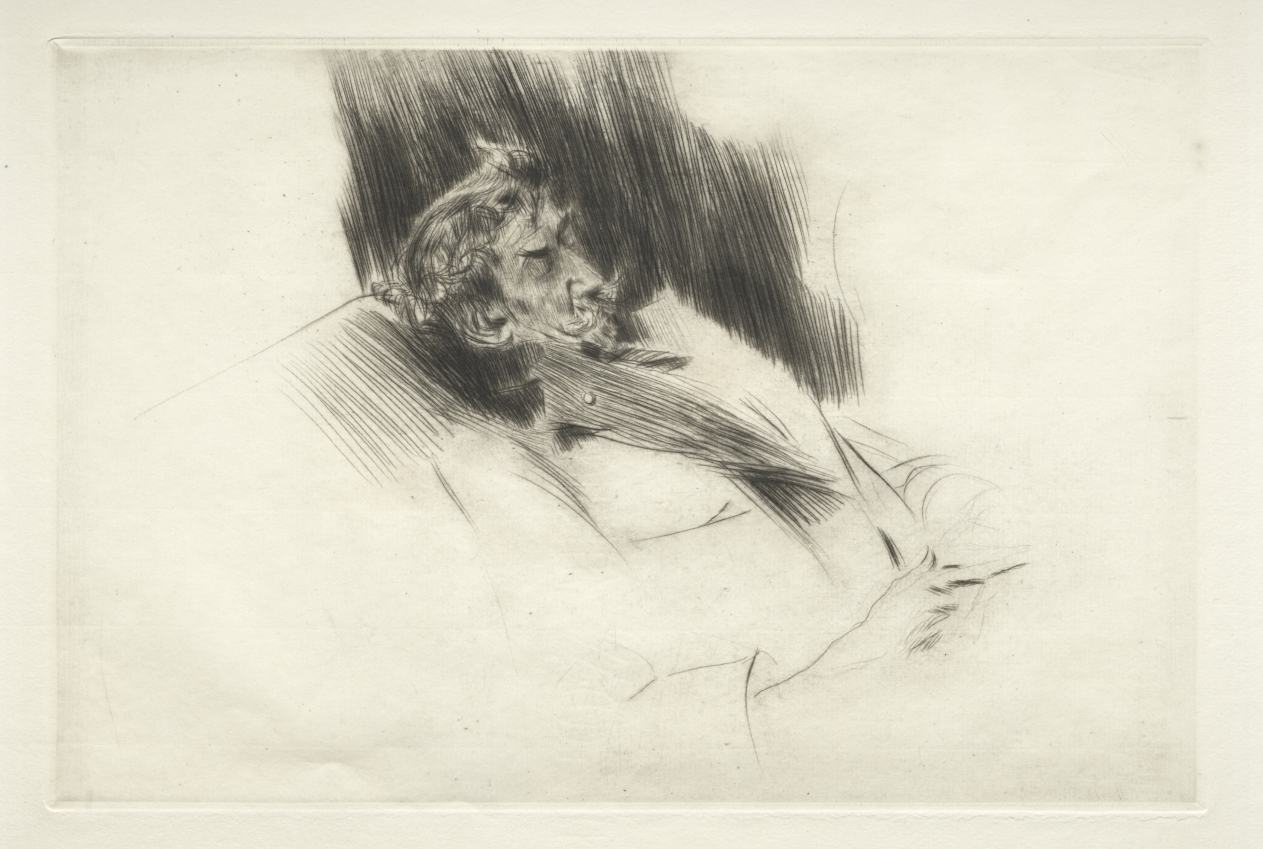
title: Whistler Asleep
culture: America, late 19th Century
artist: Giovanni Boldini (Italian, 1842–1931)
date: 1897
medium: drypoint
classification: Print